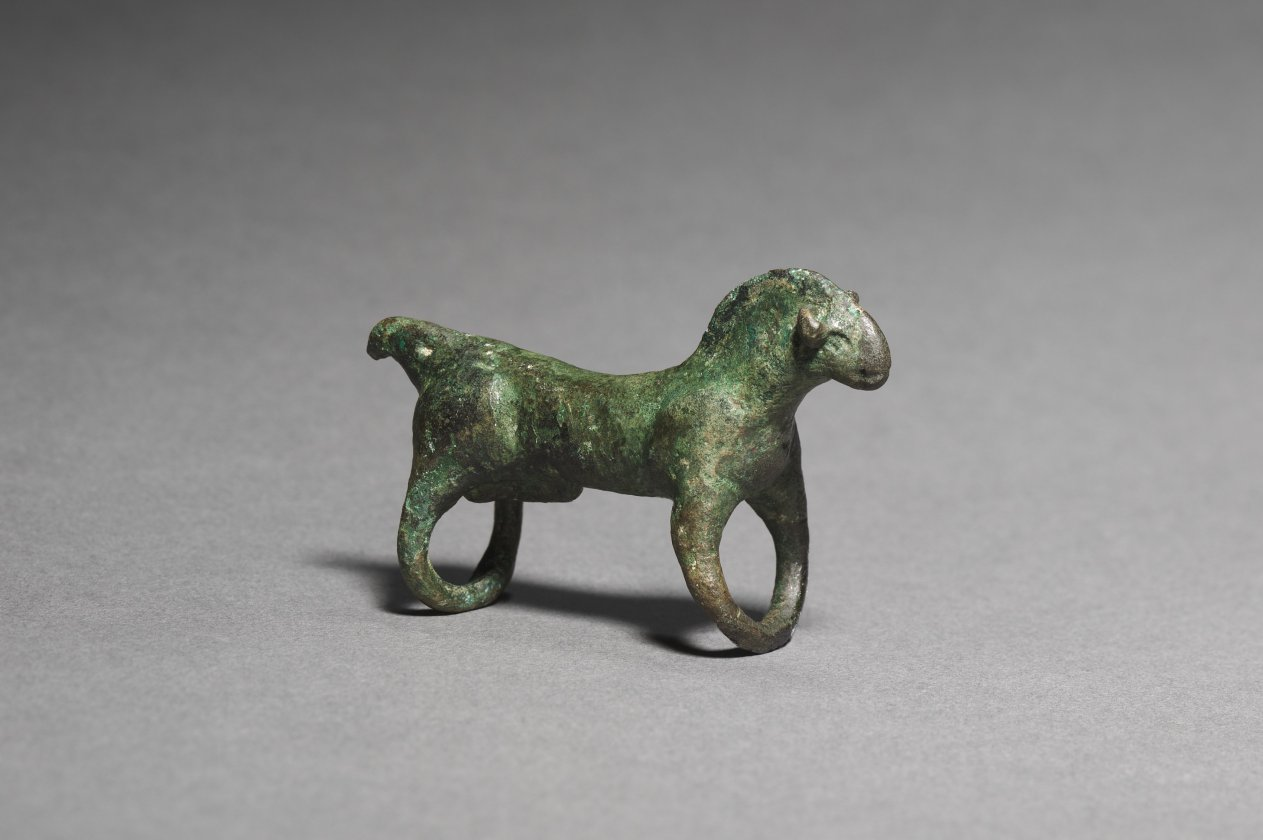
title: Horse Figurine with Looped Legs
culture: Northern Greece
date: mid-600s BCE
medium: bronze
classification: Metalwork